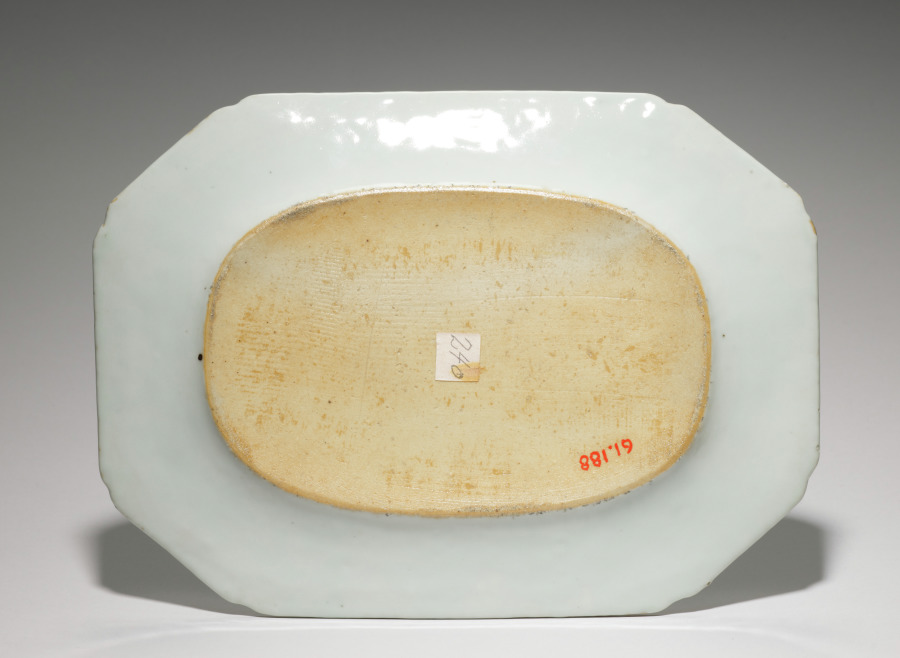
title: Small Platter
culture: China, Chinese Export -- American Market, early 19th century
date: c. 1800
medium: porcelain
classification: Ceramic